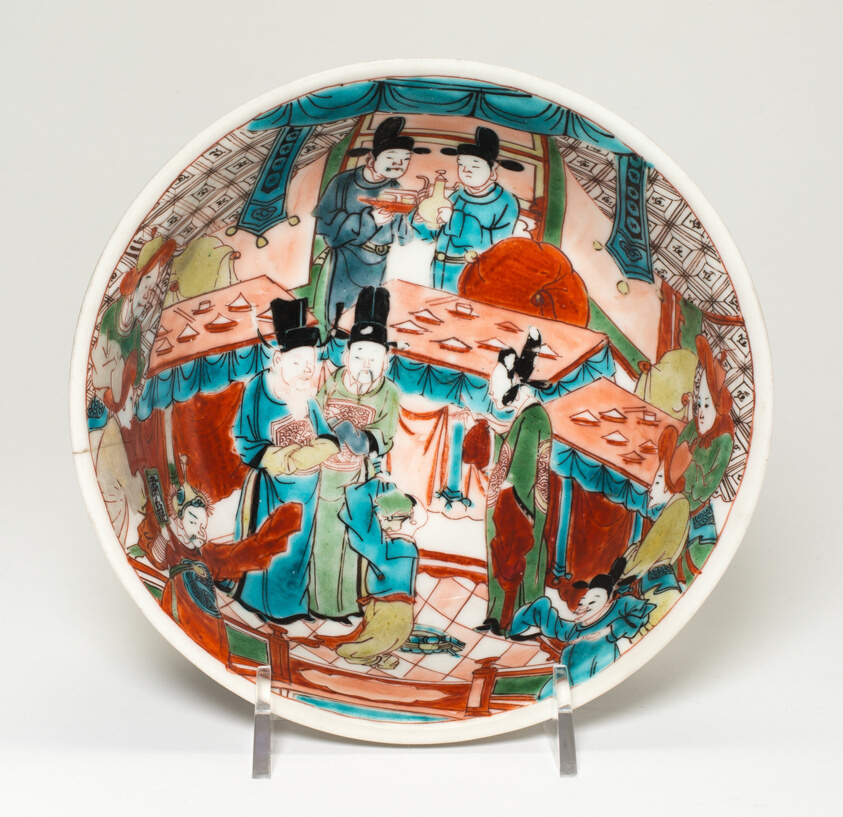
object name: Vessel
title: Bowl with a Court Scene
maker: China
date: Ming dynasty (1368–1644)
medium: Porcelain painted in overglaze enamels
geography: China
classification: porcelain; asian art; ceramics; vessel